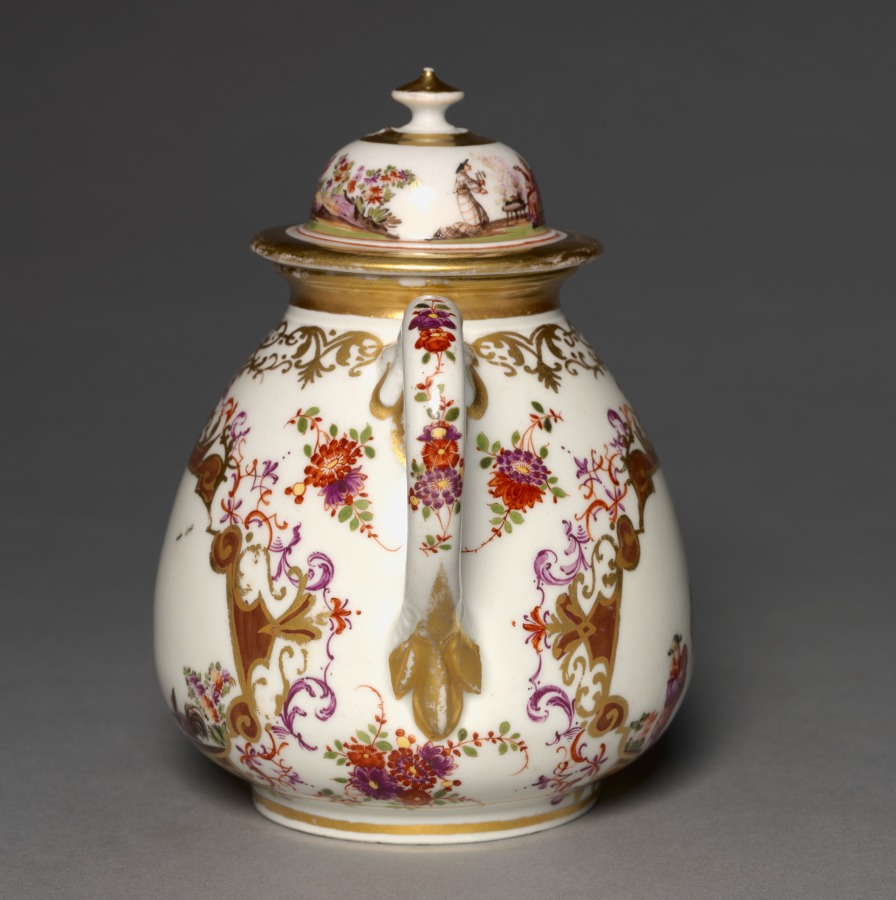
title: Tea Pot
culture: Germany, Meissen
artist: Meissen Porcelain Factory (German, est. c. 1710)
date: c. 1723–24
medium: gilt porcelain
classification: Ceramic